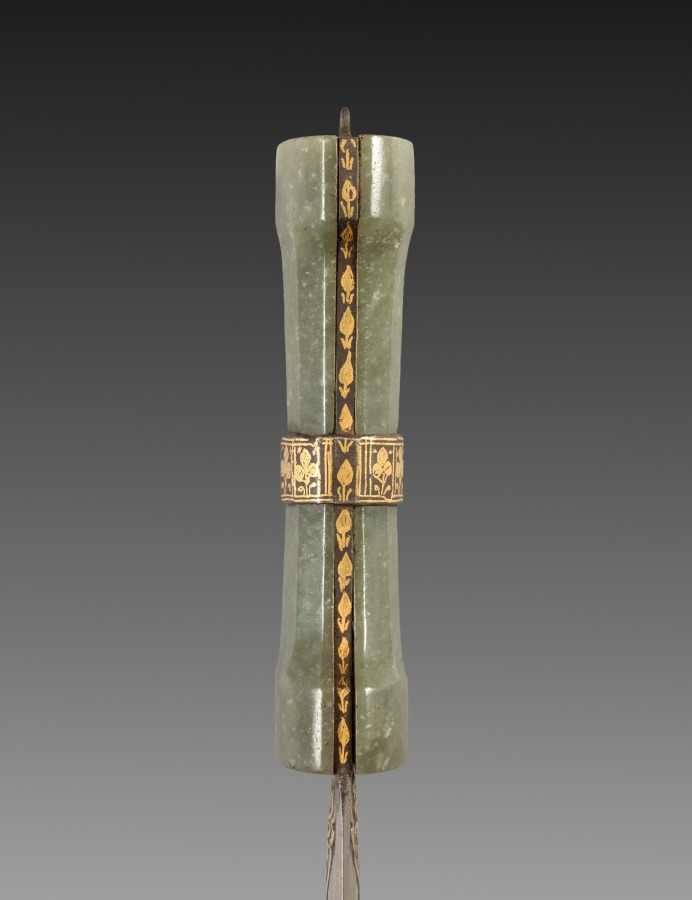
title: Dagger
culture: India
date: 1700s–1800s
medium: Jade hilt with iron and gold; steel blade with iron and gold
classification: Arms and Armor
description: Daggers with curved blades, known as khanjar, were worn tucked into the belt as one of the basic accessories for Mughal men. An all-purpose knife that could be used in hunting or fighting, the khanjar was also a visible status symbol. The use of jade and gold indicates that this dagger was owned by a member of the court. The gold inscriptions on the blade, just under the hilt, are quotations from the Qur’an, the most sacred book for Muslims. On one side is the opening line: “In the Name of God the Merciful and the Compassionate,” and on the other is a popular verse from chapter (sura) 61: “Help comes from God, and Victory is imminent.”